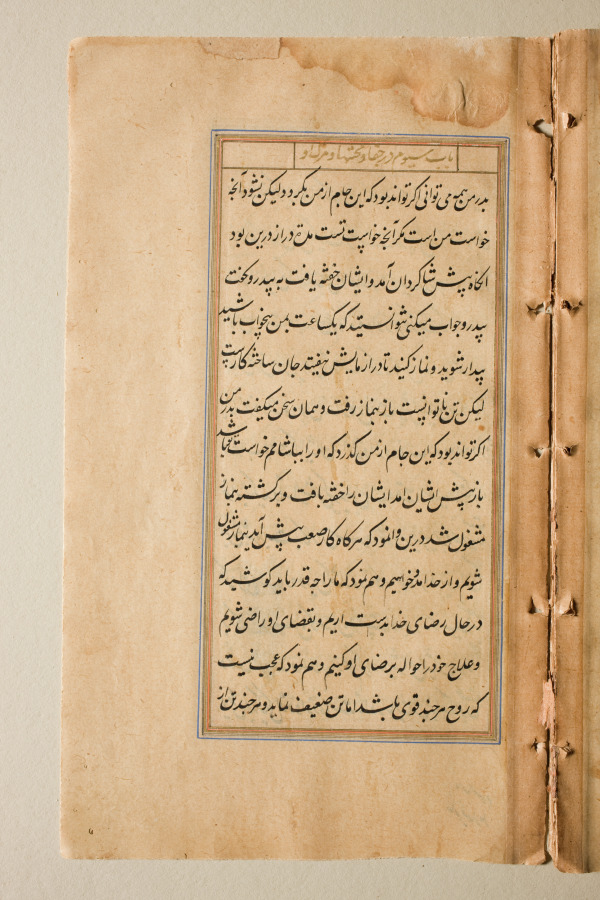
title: Text page from a Mirror of Holiness (Mir’at al-quds) of Father Jerome Xavier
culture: Mughal India, Allahabad, made for Prince Salim (1569–1627)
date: 1602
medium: Ink and gold on paper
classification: Manuscript